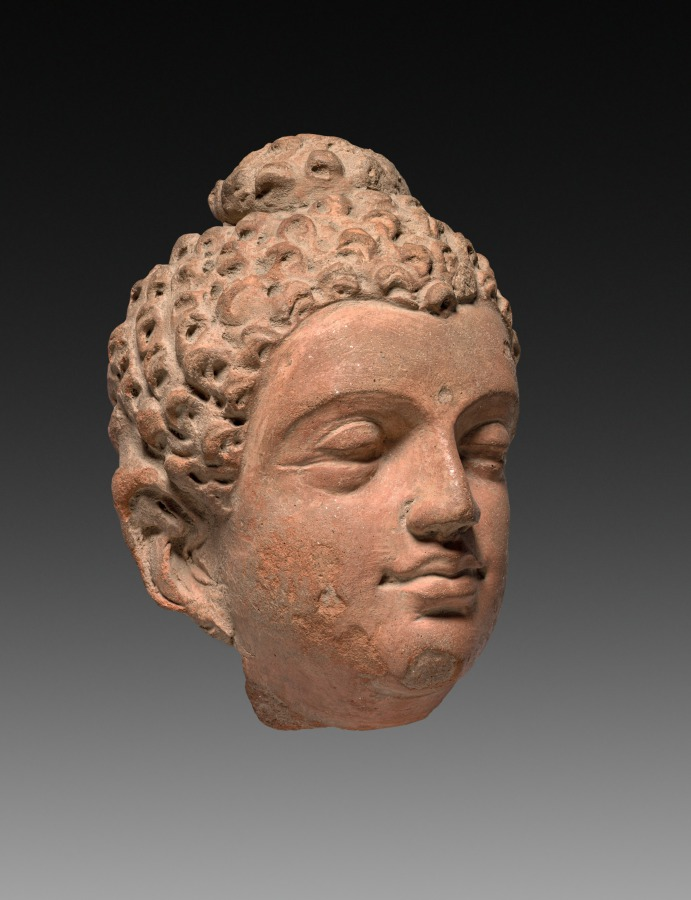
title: Head of Buddha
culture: India, Kashmir, Akhnur school, 8th century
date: 700s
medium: Clay, accidentally burned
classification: Sculpture